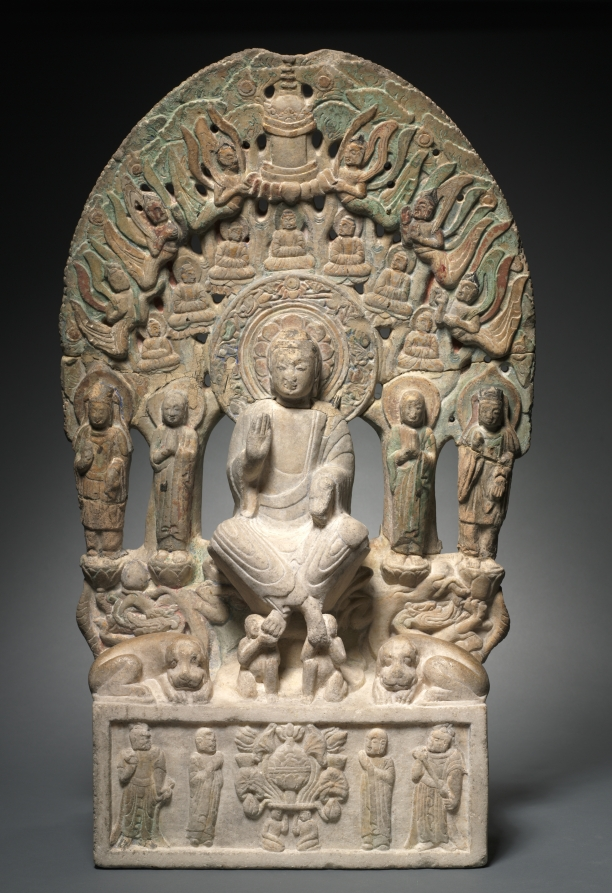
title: Stele: Maitreya as the Future Buddha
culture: China, Hebei, Six Dynasties period (317-581), Northern Qi dynasty (550-577)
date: 300s–500s CE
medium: marble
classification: Sculpture